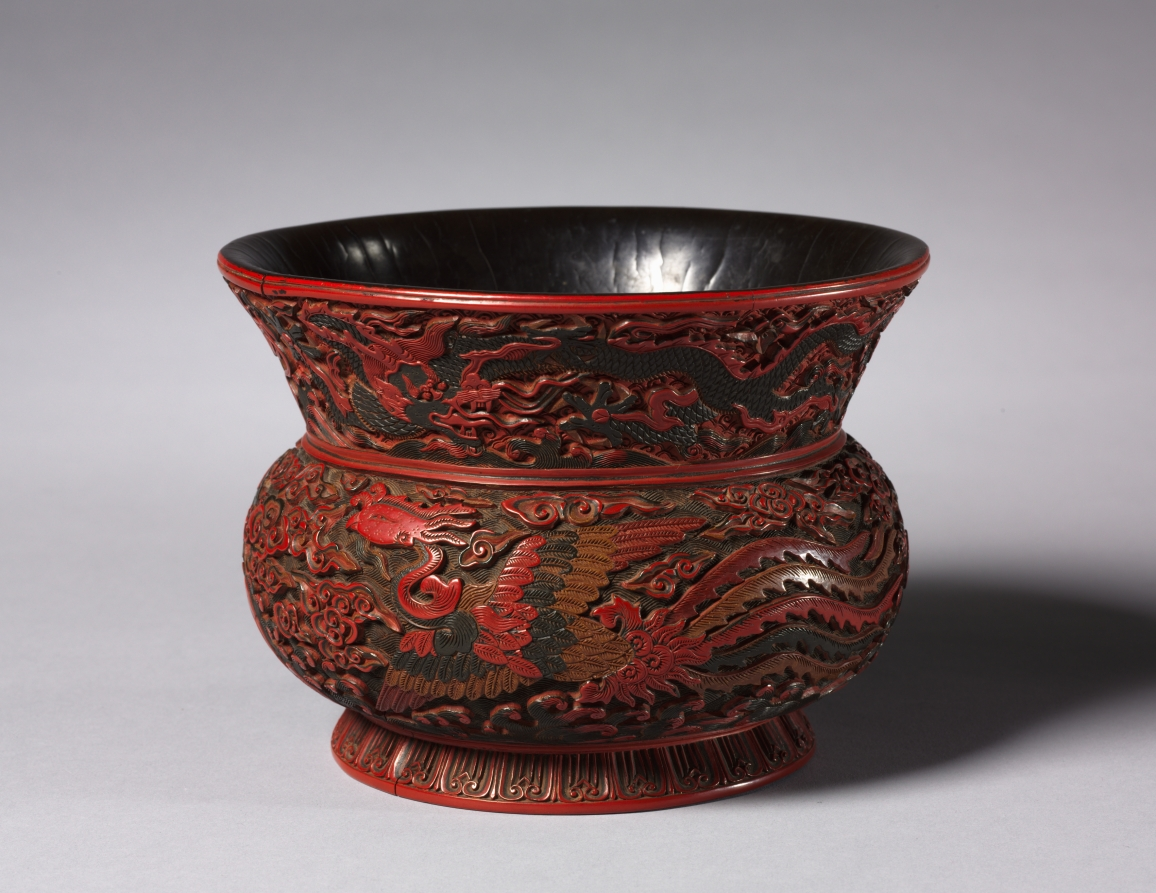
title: Jar with Dragon and Phoenix Design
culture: China, Jiangxi province, Jingdezhen, Ming dynasty (1368-1644), Jiajing mark and reign (1522-66)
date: 1522–66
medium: carved lacquer in cinnabar and other colors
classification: Lacquer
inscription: 大明嘉靖年製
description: A phoenix and dragon alternating with two auspicious ornate characters—“fortune” 福（fu) and “longevity” 壽 (shou)—adorn this exquisitely carved lacquer jar. Similar to contemporary five-color (wucai) decoration on porcelain, this jar shows layers of lacquer in black, ochre, green, and cinnabar (red). In a time-consuming process, a multitude of lacquer coatings were applied to the wooden core before its design could be carved into the surface. The phoenix and dragon are imperial emblems suggesting that this jar was made for the court. The base of the jar is inscribed: “Made in the Jiajing-era of the Great Ming [dynasty].”